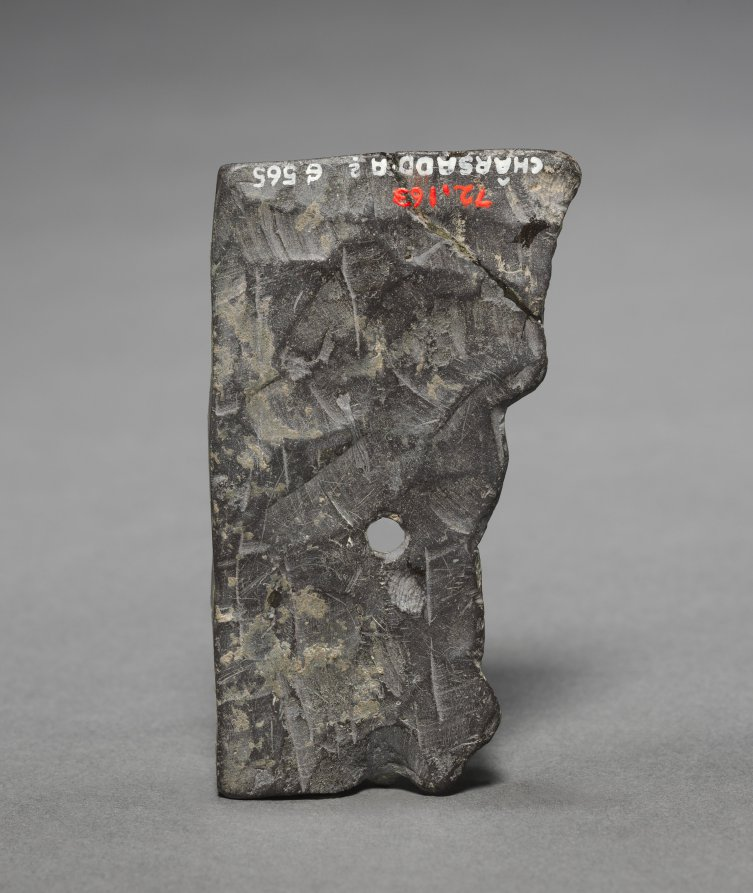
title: Vishnu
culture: India, Kashmir, 8th century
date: 700s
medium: steatite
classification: Sculpture